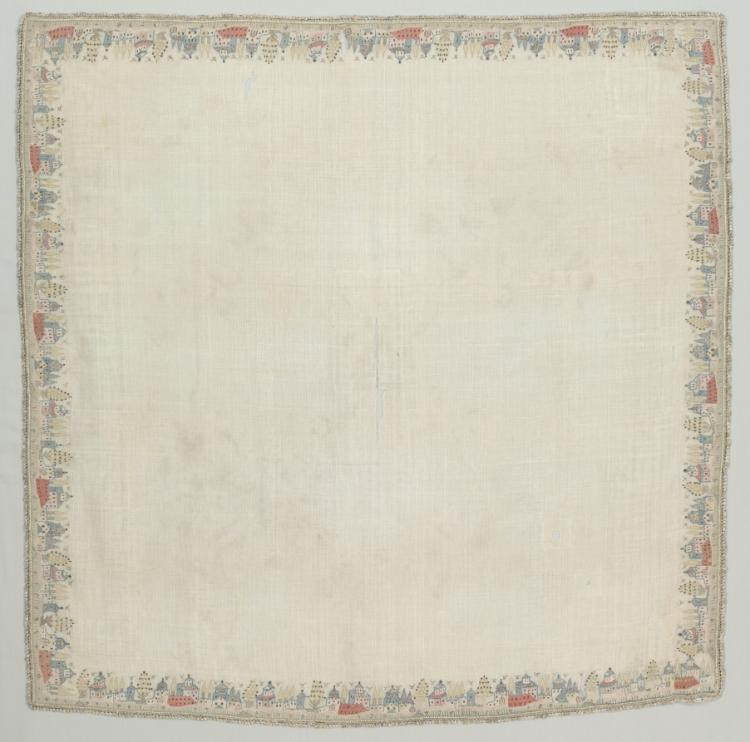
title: Table Cloth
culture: Turkey, Late 18th- Early 19th century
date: c. 1775–1825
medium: metallic embroidery on cotton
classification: Embroidery